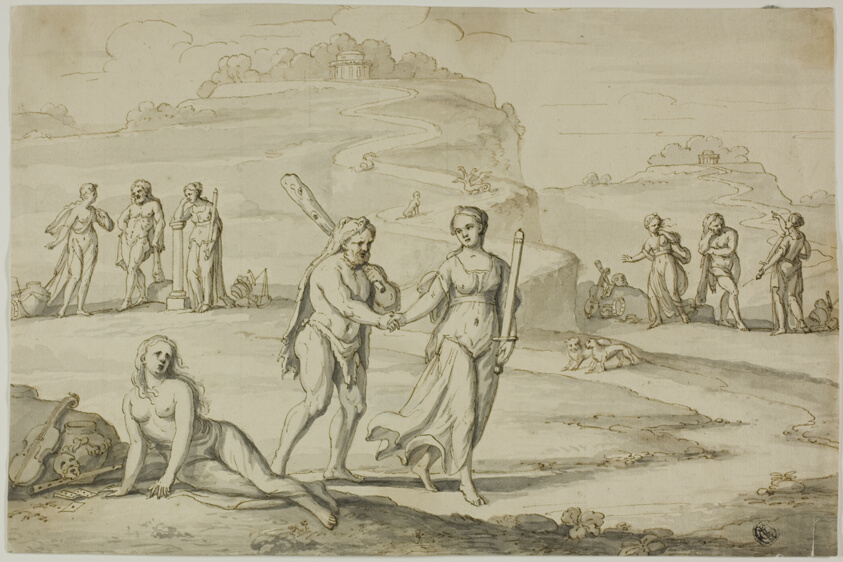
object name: Drawing and Watercolor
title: The Choice of Hercules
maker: Unknown Artist; Great Britain, n.d.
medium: Pen and brown ink, with brush and gray wash, on cream laid paper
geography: England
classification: pen and ink drawings; drawings (visual works); prints and drawing